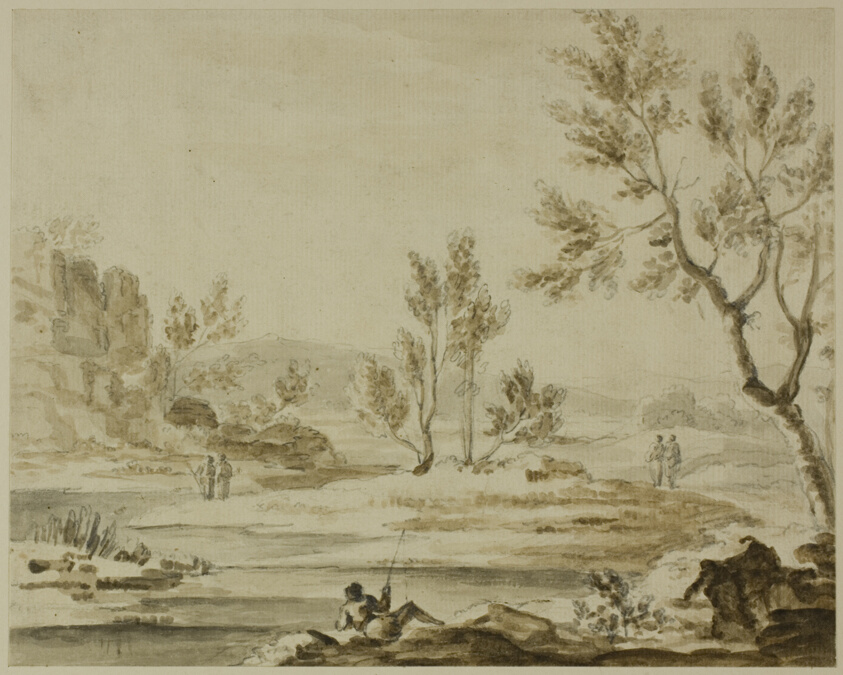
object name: Drawing and Watercolor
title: Fisherman and Figures in River Landscape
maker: Follower of Jean Baptiste Claude Chatelain (French, c. 1710-c. 1771)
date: 1730-1771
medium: Graphite with brush and brown wash, on ivory laid paper, laid down on card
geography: France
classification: ink or chalk wash; drawings (visual works); prints and drawing